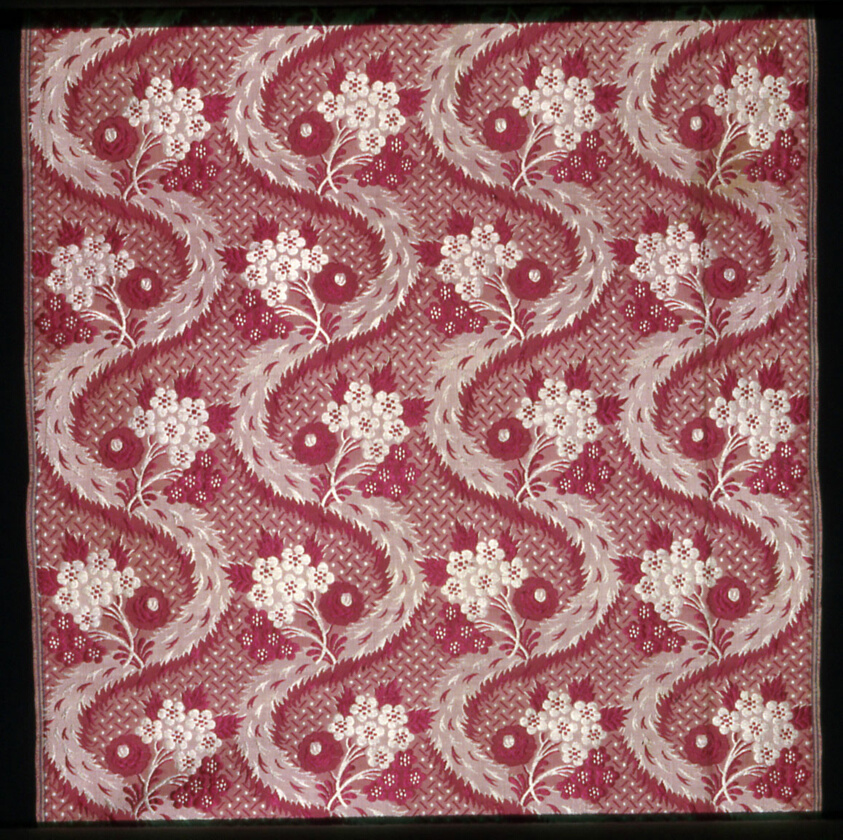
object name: Textile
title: Panel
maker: England, Spitalfields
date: 1725/50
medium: Silk, plain weave self-patterned by two-color complementary ground wefts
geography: England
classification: textile; weaving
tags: flowers, garlands